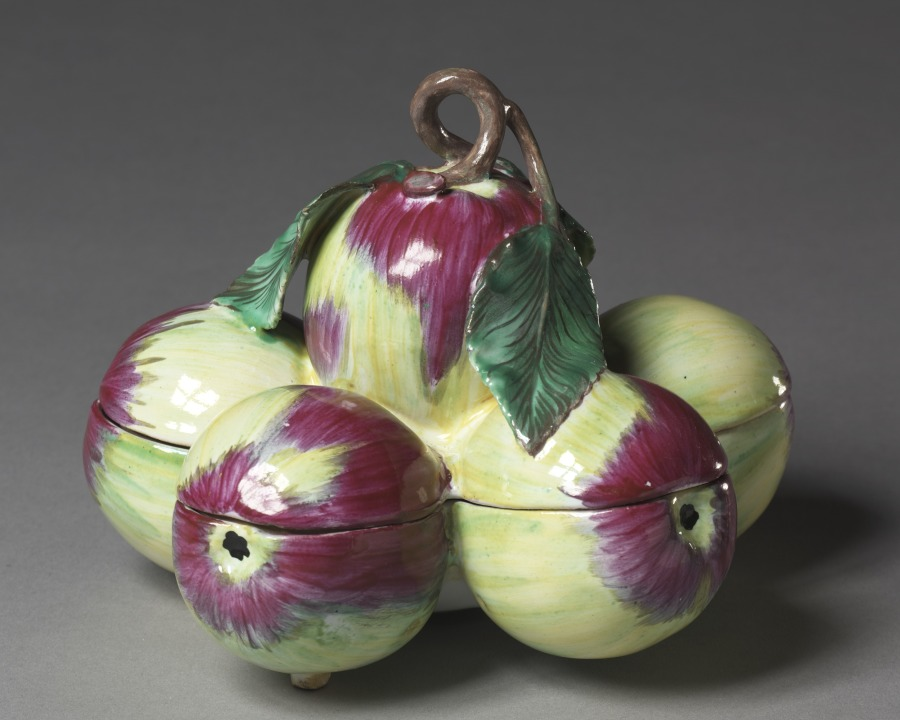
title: Covered Box in the Form of Apples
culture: France, 18th century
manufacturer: Sceaux Factory (French, active 1748–66)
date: c. 1760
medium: Tin- glazed earthenware (faience) wth enamel decoration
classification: Ceramic